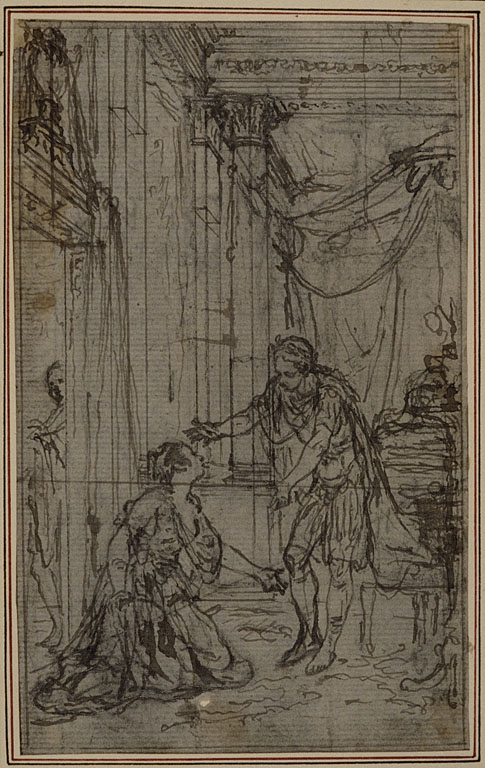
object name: Drawing and Watercolor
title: Study for Lucain's "La Pharsale", Canto X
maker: Hubert François Gravelot (French, 1699-1773)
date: c. 1766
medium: Pen and black ink, over graphite, on gray laid paper, incised for transfer, and perimeter mounted on cream laid paper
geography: France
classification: pen and ink drawings; drawings (visual works); prints and drawing